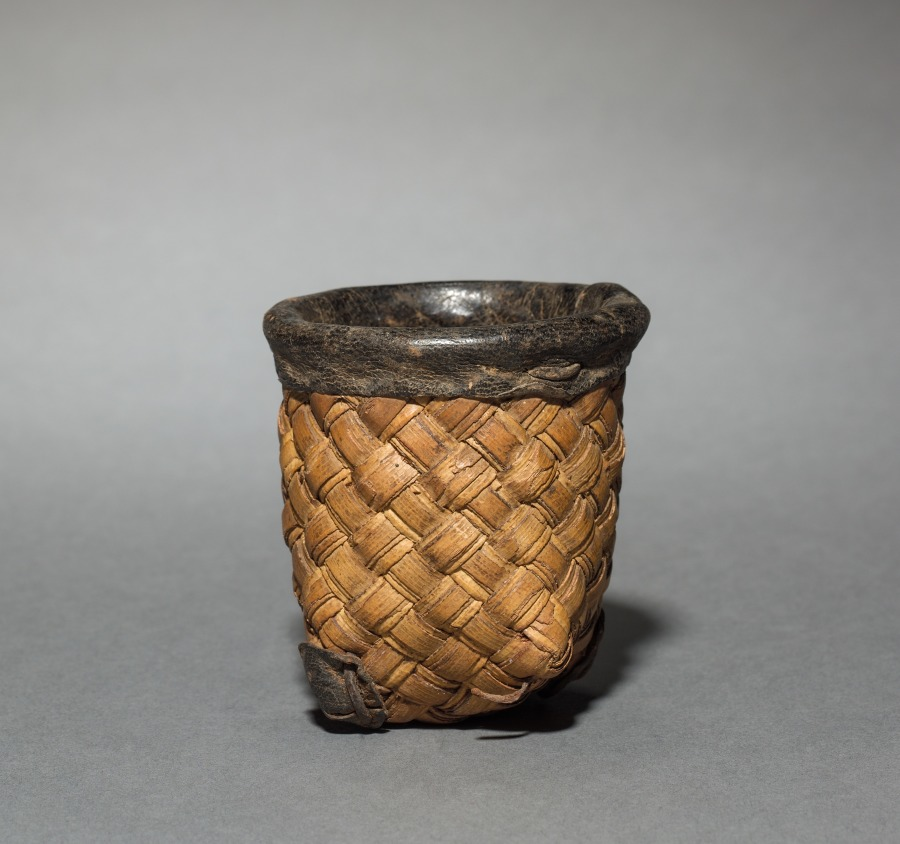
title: One of Ten Nesting Wedding Baskets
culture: Africa, Western Africa, Burkina Faso, Lobi–style maker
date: c. 1900s?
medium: Plant fiber and leather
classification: Vessels